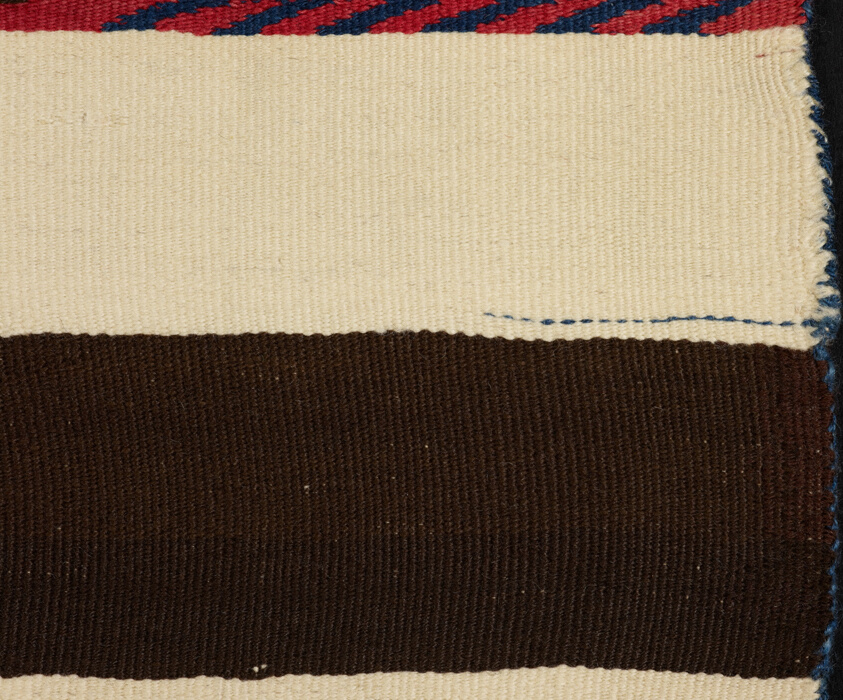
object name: Costume and Accessories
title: Wearing Blanket (Phase II)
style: navajo, americas, dine, 19th century, Arts of the Americas, indigenous, southwest, native american, north american, native north american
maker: Navajo (Diné) (Arizona, New Mexico, and Utah, United States)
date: 1850-65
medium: Wool; single interlocking tapestry weave; twined edges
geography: Navajo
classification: textile; blanket (covering); costume; garment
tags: geometric, arrow, squares, stripes